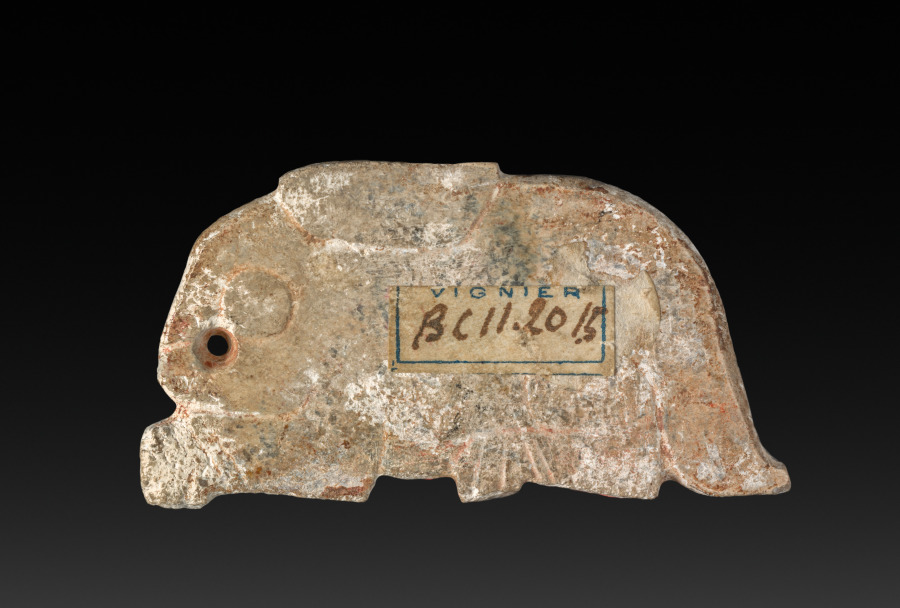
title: Hare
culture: China, Shang dynasty (c. 1600–c. 1046 BCE) to Western Zhou dynasty (c. 1046–771 BCE)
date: 1100s–800 BCE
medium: jade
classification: Jade